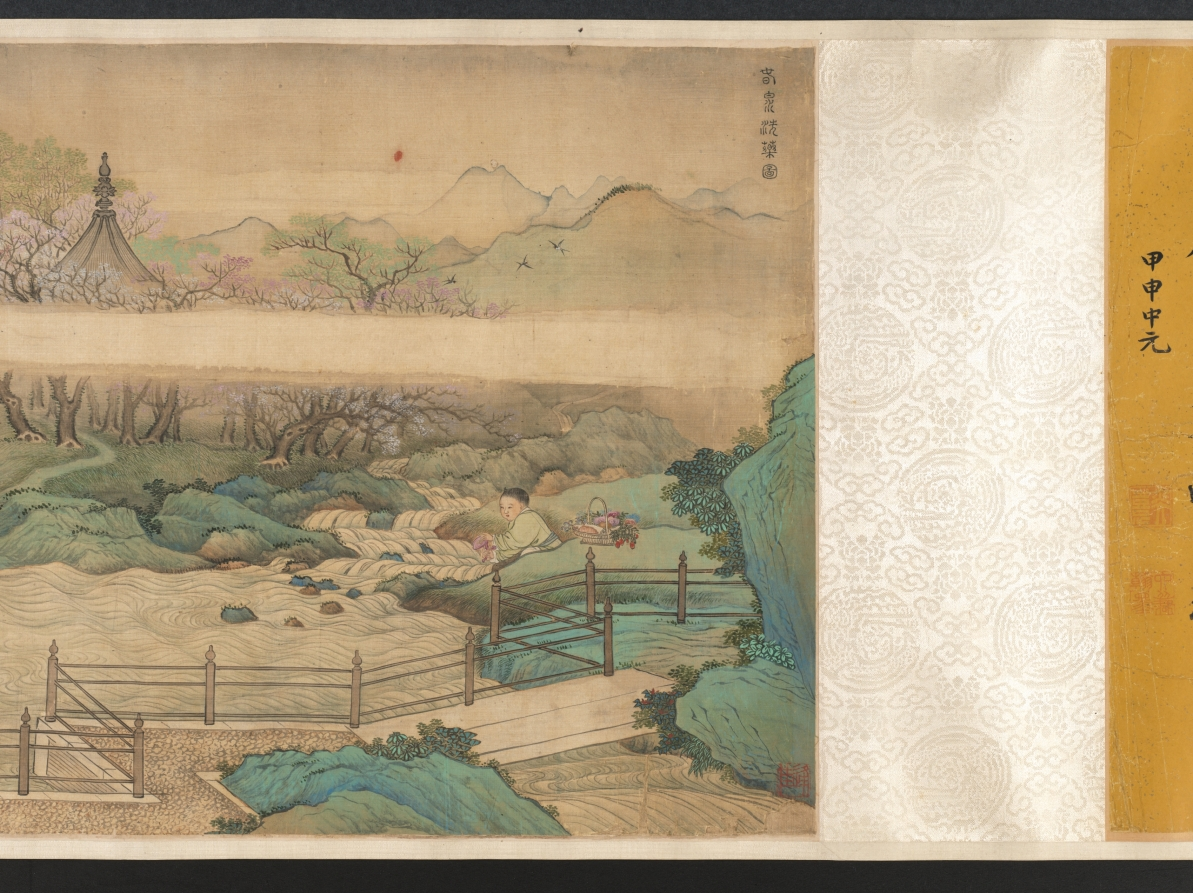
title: Cleansing Medicinal Herbs in the Stream on a Spring Day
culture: China, Qing dynasty (1644-1911)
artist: Yu Zhiding (Chinese, 1647–c. 1716)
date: 1703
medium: Handscroll; ink and color on silk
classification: Painting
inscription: Title by Chen Yixi.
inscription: 姑射仙人冰雪膚，新詩傳唱滿通都。/ 極知遲暮難為別，更展春泉洗藥圖。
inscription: Colophon by Chen Tingjing 陳廷敬 (1639–1712). Colophon by Wang Hongxu 王鴻緒 (1645–1723), dated 1707. Colophon by Song Luo 宋犖 (1634–1714). Colophon by Liu Yan 劉巗. Colophon by Jing Xikui 涇西夔. Colophon by Liu Yan 劉巗. Colophon by Cao Yin 曹寅. Colophon by Wang Shihong 汪士鋐. Colophon by Wang Shidan 王式丹 (1645–1718), dated 1712. Colophon by Shi Shenyi 史申義 (1661–1712), dated 1712. Colophon by Yin Yuqing 殷餘慶, dated 1712.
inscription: Colophon by Chen Shixia 陳時夏, dated 1729.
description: A famous portraitist, Yu Zhiding here depicts the likeness of Shi Shenyi 史申義 (1661–1712), an official and poet. Master Shi, a sickly man, was deeply interested in medicinal science. The opening section of the scroll features a boy washing a fungus in fresh spring water, a basket of medicinal herbs by his side. Other servants carry a fan, a bundle of scrolls, and a cup of tea or hot wine. Master Shi sits in a bamboo grove, surrounded by fields of herbs. Returning swallows, pink peach blossoms, and blooming magnolia indicate spring, whereas the fungus conveys wishes for long life. The spring theme may express the artist’s wish for his friend’s recovery.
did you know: In the pavilion are some of Shi Shenyi’s scholarly accoutrements: a stack of books, an antique zun 尊 (wine vessel), a brush holder, an ink stone, and a small chime.